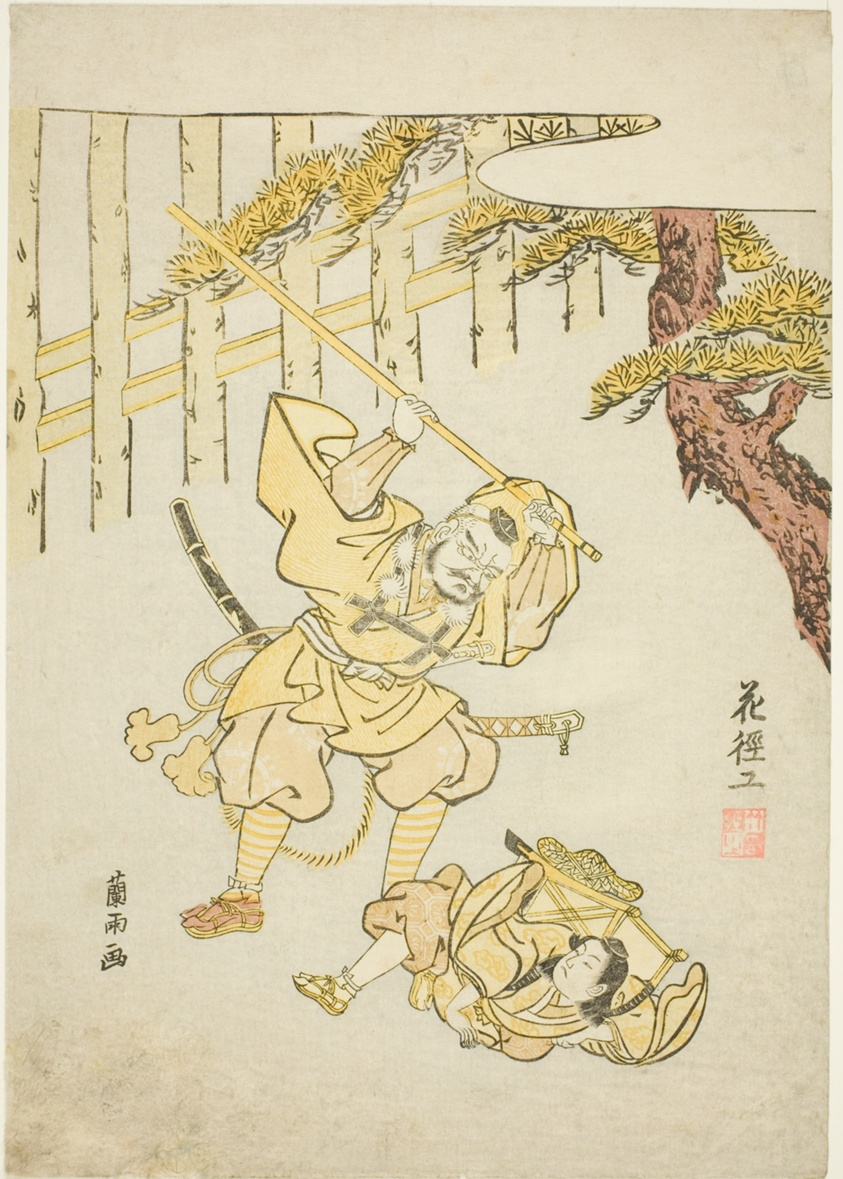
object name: Print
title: Yoshitsune and Benkei at Ataka barrier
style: Japanese (culture or style)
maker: Ran-u (Japanese, 18th century)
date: 1765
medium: Color woodblock print; chuban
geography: Japan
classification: woodblock print; print; asian art